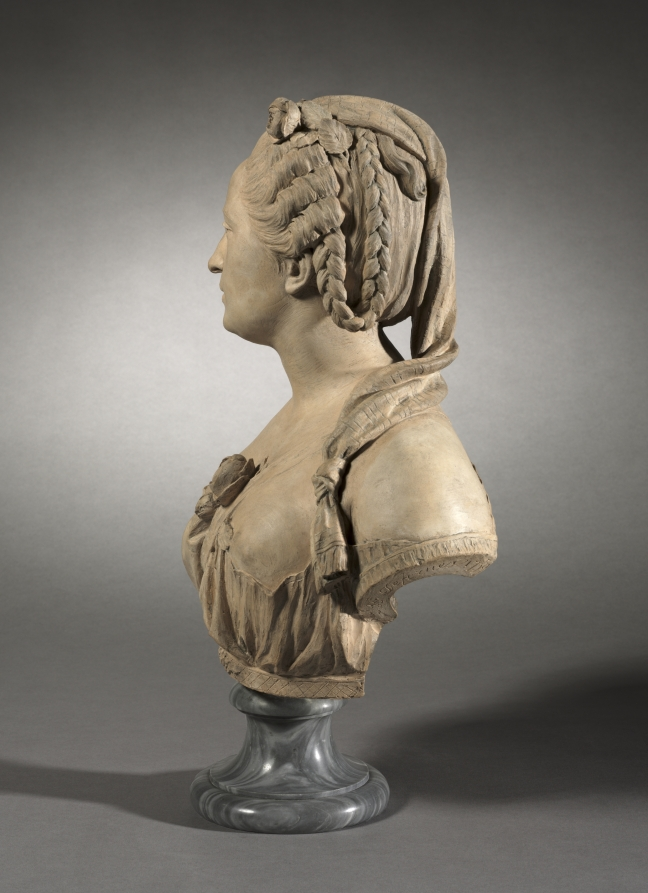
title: Portrait of a Woman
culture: France, 18th century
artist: Jean-Baptiste Defernex (French, c. 1729–1783)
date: 1759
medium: terracotta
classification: Sculpture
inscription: Signed on cut of left proper arm: "p[ar?] j. B, F, Defernex 1759"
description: The precise rendering of the costume and the unique facial features of the woman indicate this work is a true portrait, although the sitter has yet to be identified.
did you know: Art historians describe Defernex's portrait busts as "honest, unidealized, [and] quite free from gallant flattery."